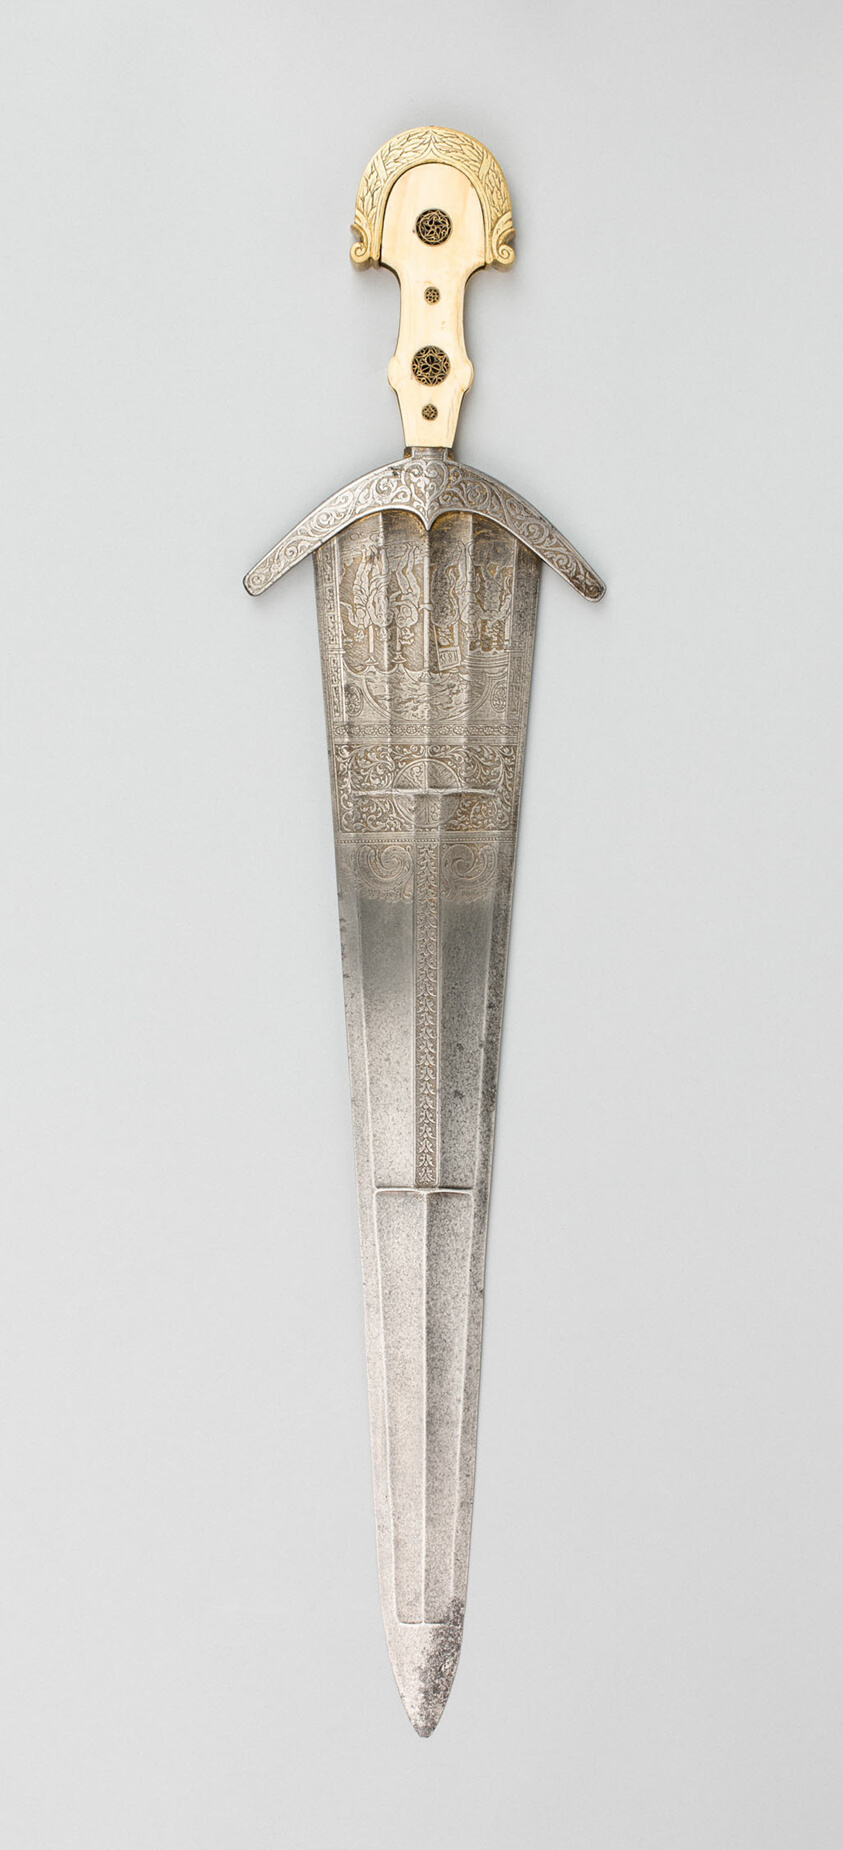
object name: Arms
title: Cinquedea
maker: Italian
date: 19th century in early 16th century Italian style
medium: Bone and brass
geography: Italy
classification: edged weapon-dagger; arms; arms and armor